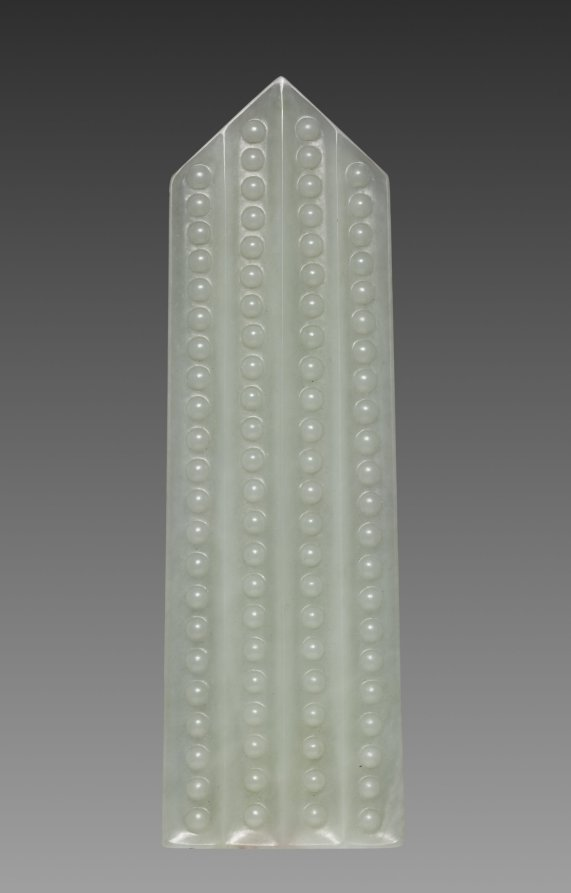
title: Tablet (gui) with Grain Pattern and Imperial Inscription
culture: China, Qing dynasty (1644–1911), Qianlong reign (1736–95)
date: 1793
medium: translucent white jade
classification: Jade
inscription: The Qianlong emperor's essay "On the Seal of the Old Man of the Ten Accomplishments" is inscribed on the reverse of the scepter. The inscription is signed and dated: 乾隆癸丑仲春御製 [Written by Emperor Qianlong in the middle of spring 1793, the guichou year].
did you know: The Qianlong emperor's essay "On the Seal of the Old Man of the Ten Accomplishments" is inscribed on the reverse of the scepter.